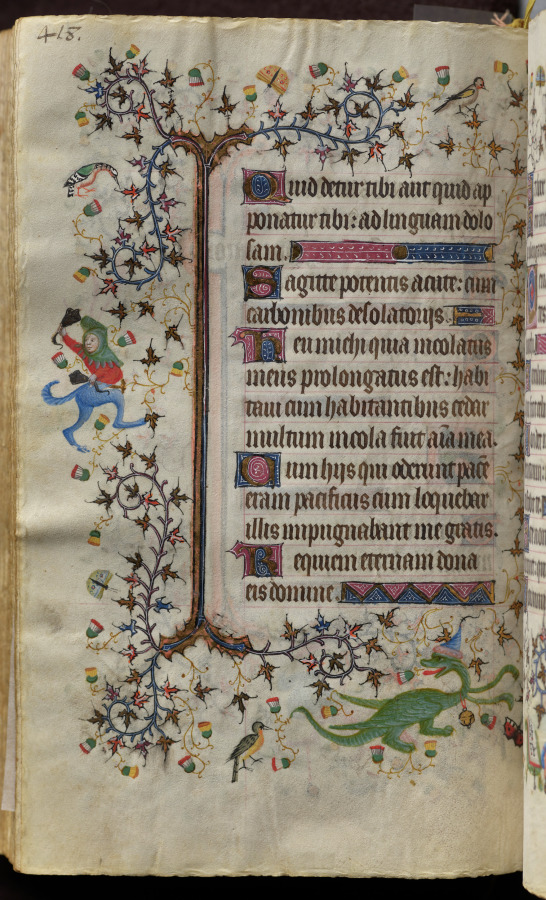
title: Hours of Charles the Noble, King of Navarre (1361-1425): fol. 203v, Text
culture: France, Paris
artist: Master of the Brussels Initials and Associates (French)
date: c. 1405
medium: ink, tempera, and gold on vellum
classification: Bound Volume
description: This precious volume was obviously highly prized by its owner, the French-born King of Navarre, who had his coat of arms painted on no less than twenty folios. Rather than directly commissioning this manuscript from a specific workshop, it seems that Charles the Noble acquired his book of hours -- perhaps ready-made for the luxury market -- while on a trip to Paris in 1404-05. A collaborative effort, six painting styles are evidenced within the pages of this codex, those of two Italians, two Frenchmen, and two Netherlanders. The painter who was responsible for the planning and decoration of the book, and who produced seventeen of the large miniatures, was a Bolognese artist known as the Master of the Brussels Initials. His principal assistant, responsible for most of the borders, was a Florentine who signed his name "Zecho" da Firenze on folio 208 verso.